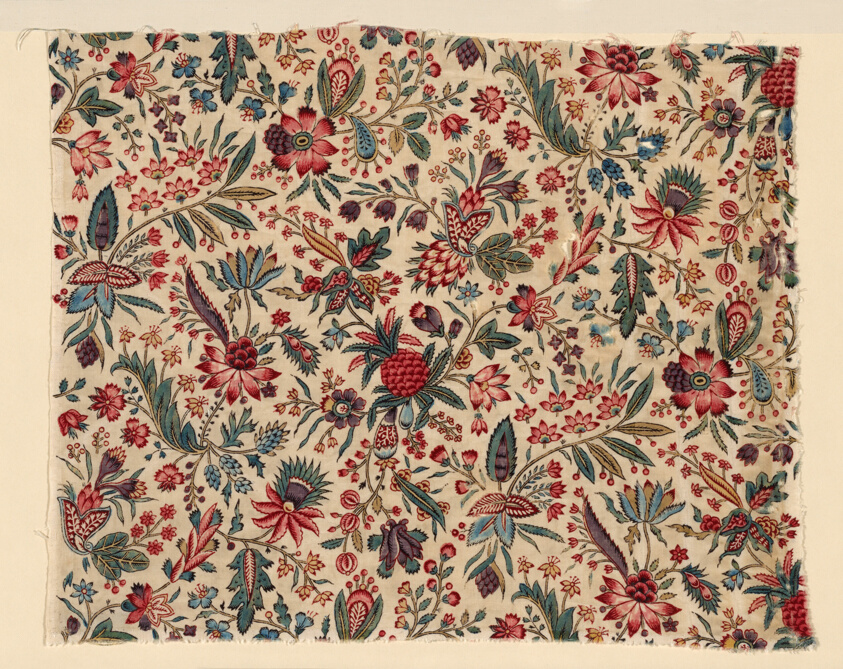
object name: Textile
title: Fragment (Furnishing Fabric)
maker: France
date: 1775/1800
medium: Cotton, plain weave; block printed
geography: France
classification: textile; weaving - printed; furnishing textile